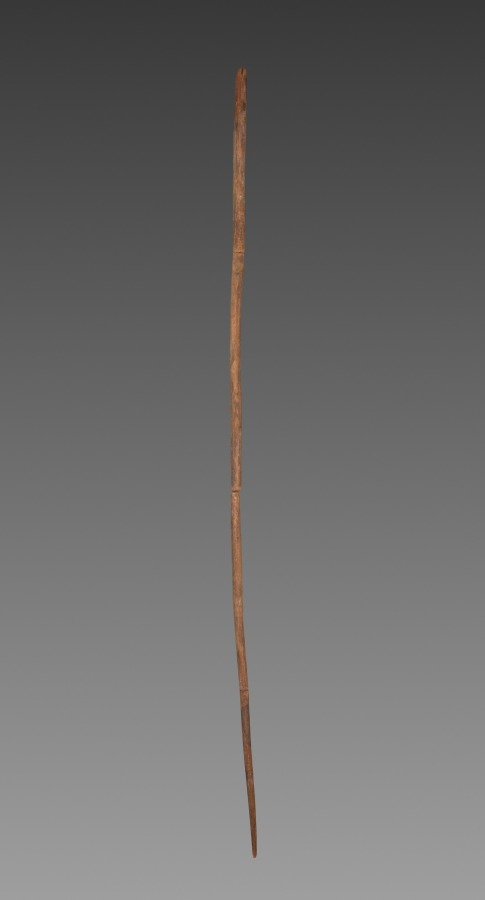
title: Three Pieces of an Arrow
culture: Egypt, First Intermediate period (2123–2040 BCE)–Middle Kingdom (2040–1648 BCE)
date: 2123–1814 BCE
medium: wood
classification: Arms and Armor